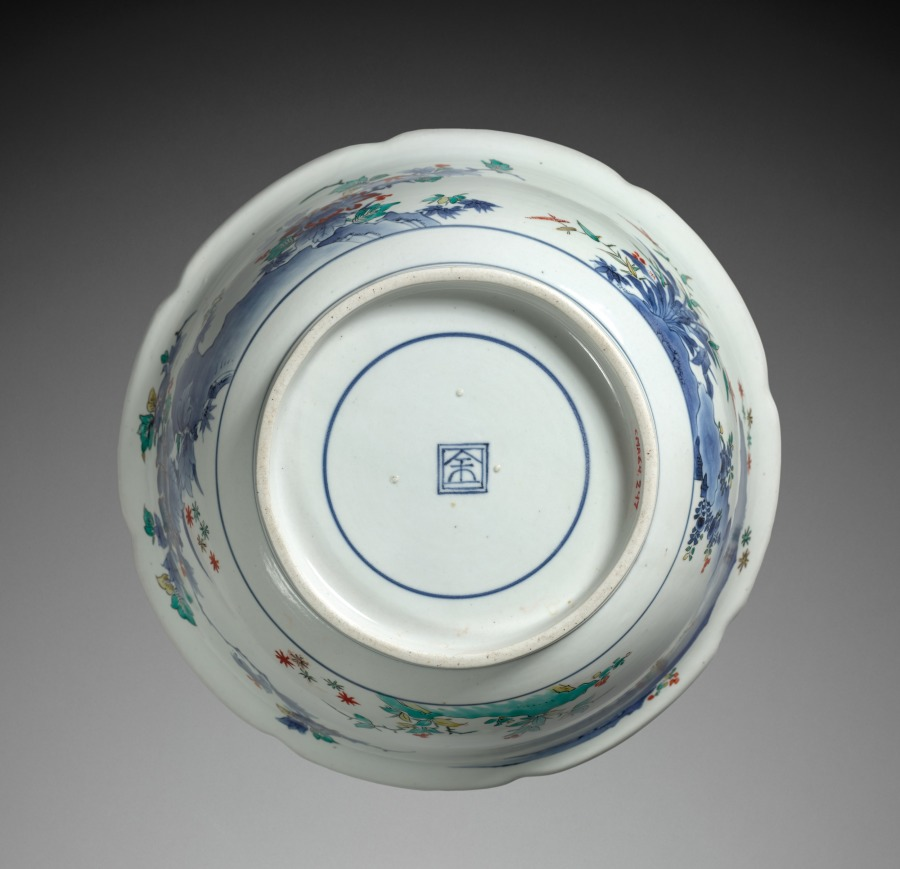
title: Bowl with Lion and Flowers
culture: Japan, Edo period (1615–1868)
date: 1700s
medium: porcelain, molded, with underglaze blue and overglaze color enamel (Hizen ware, Kakiemon type)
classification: Ceramic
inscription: 金